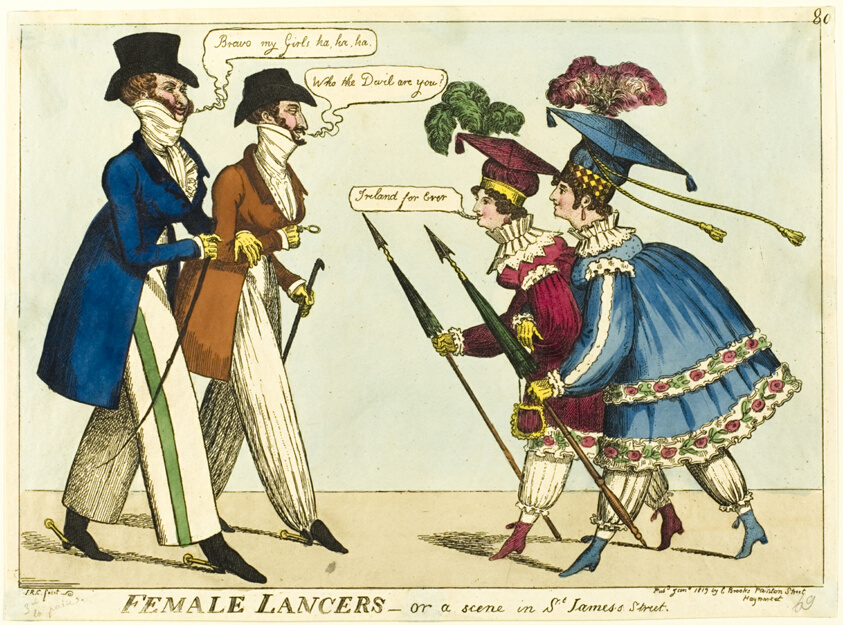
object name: Print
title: Female Lancers - or A Scene in St. James's Street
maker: Isaac Robert Cruikshank (English, 1789-1856); published by E. Brooks (English, 1830-1817)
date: published January, 1819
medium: Hand-colored etching on paper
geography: England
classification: etching; print; prints and drawing